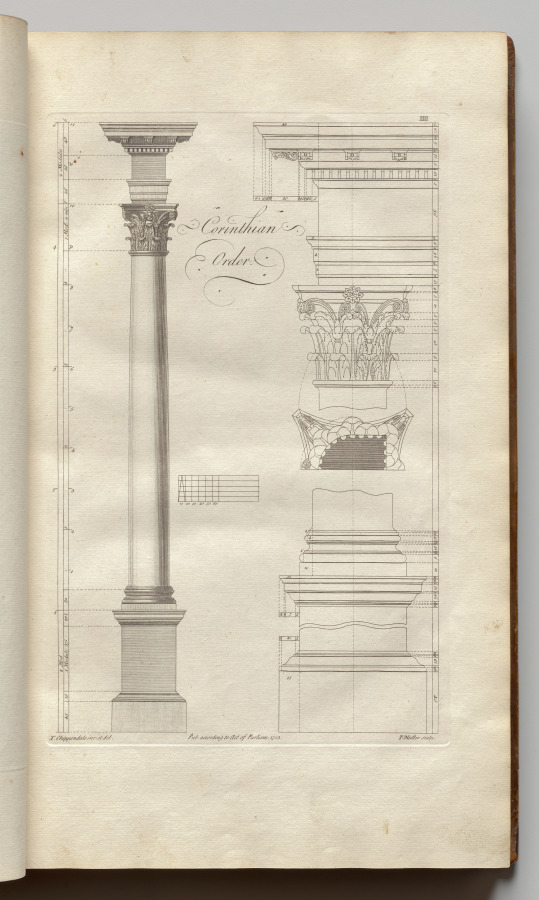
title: The Gentleman and Cabinet-Maker's Director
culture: Britain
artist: Thomas Chippendale (British, 1718–1779)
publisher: T. Becket & P. A. de Hondt (British)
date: 1762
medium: Paper, leather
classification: Bound Volume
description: Through his designs for furniture and architectural elements, Thomas Chippendale became one of the most influential tastemakers of the 1700s. He published three editions of The Gentleman and Cabinet-Maker’s Director (1754, 1755, and 1762), which sold widely in Britain, Ireland, and America. This rare French version of the third edition demonstrates his effort to spread his designs for both naturalistic and neoclassical decoration even wider across Europe.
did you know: Fewer than fifteen copies, including this one, of the French edition of Thomas Chippendale’s famous book of designs, are known to exist.